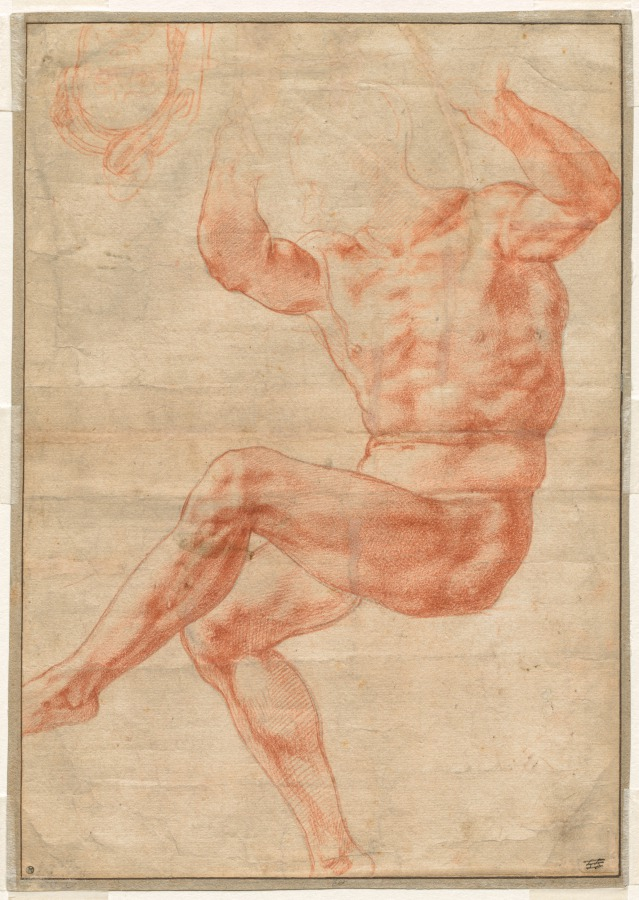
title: Study for the Nude Youth over the Prophet Daniel (recto)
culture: Italy, 16th century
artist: Michelangelo Buonarroti (Italian, 1475–1564)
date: 1510–1511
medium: red chalk over black chalk or charcoal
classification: Drawing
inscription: lower right, in brown ink: 55 [crossed out]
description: Universally considered one of the greatest artists of the Italian Renaissance, Michelangelo devoted four years to painting the vast ceiling fresco in the Sistine Chapel. This preparatory study portrays one of the 20 athletic male nudes, known as ignudi, who serve as supporting figures at each corner of the Old Testament scenes painted down the center of the ceiling. Michelangelo worked out the positioning of the ignudi in red chalk drawings before beginning to paint each section of wet plaster. The energy and monumentality of the figure in red chalk, whose body extends beyond the sheet, suggests the heroic athleticism of Michelangelo’s sculpture.